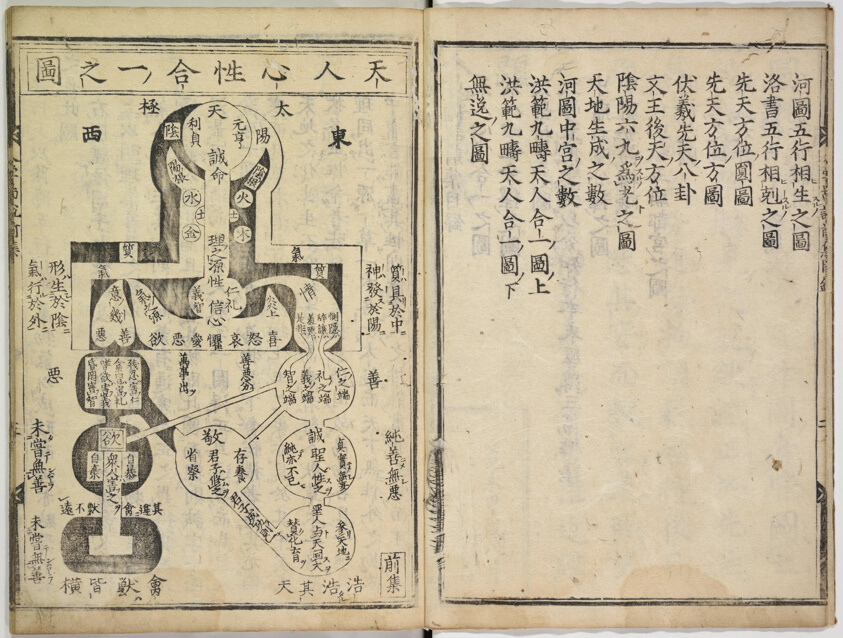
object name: Book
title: Ilustrated Discourse on the Entrance to Learning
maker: Artist unknown, Japanese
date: 1631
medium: Woodblock-printed book; 2 vols.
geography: Japan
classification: book